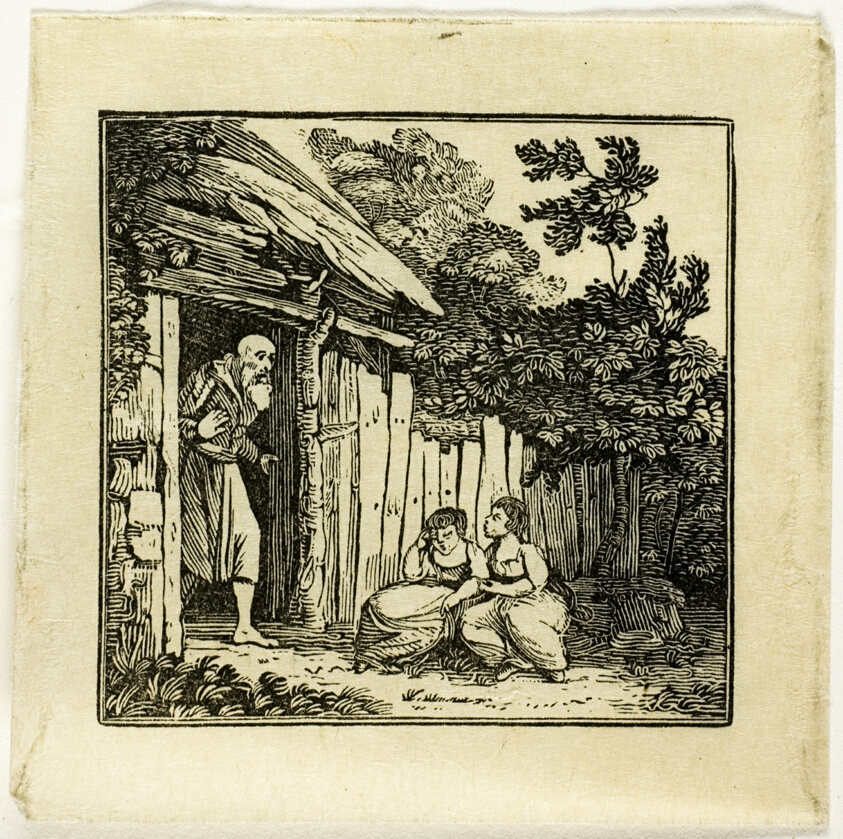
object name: Print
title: Book Illustration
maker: Thomas Bewick (English, 1753-1828)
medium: Wood engraving on paper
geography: England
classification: wood engraving; print; prints and drawing